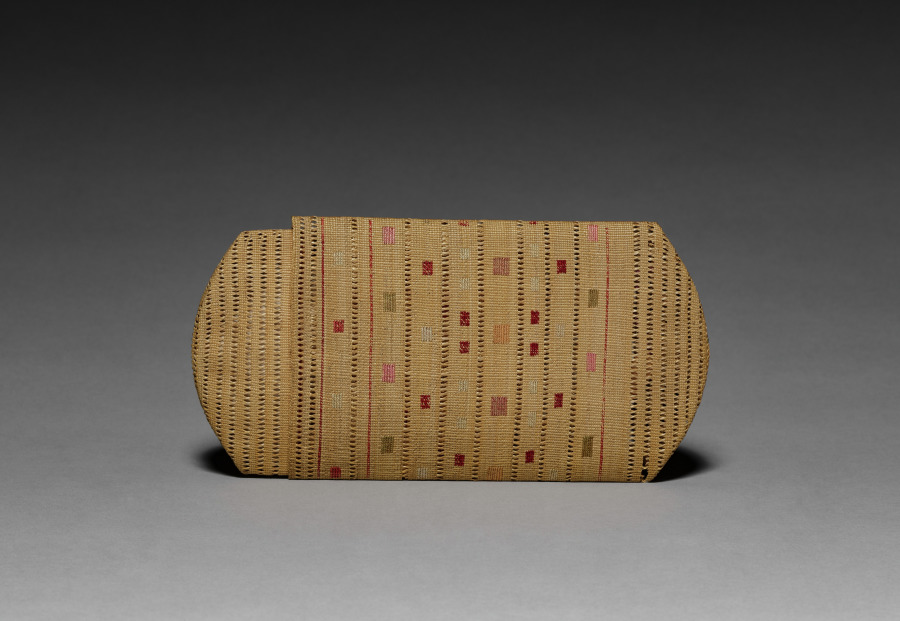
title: Cigarette or Needle Case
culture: Arctic, Aleut, Attu, Post-Contact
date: c 1875– 1917 (source unknown)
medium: plain twine, wild rye grass with crossed openwork, patterned twined start, intersecting layered spokes, and plaited finish; silk embroidery (catalogue card)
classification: Basketry